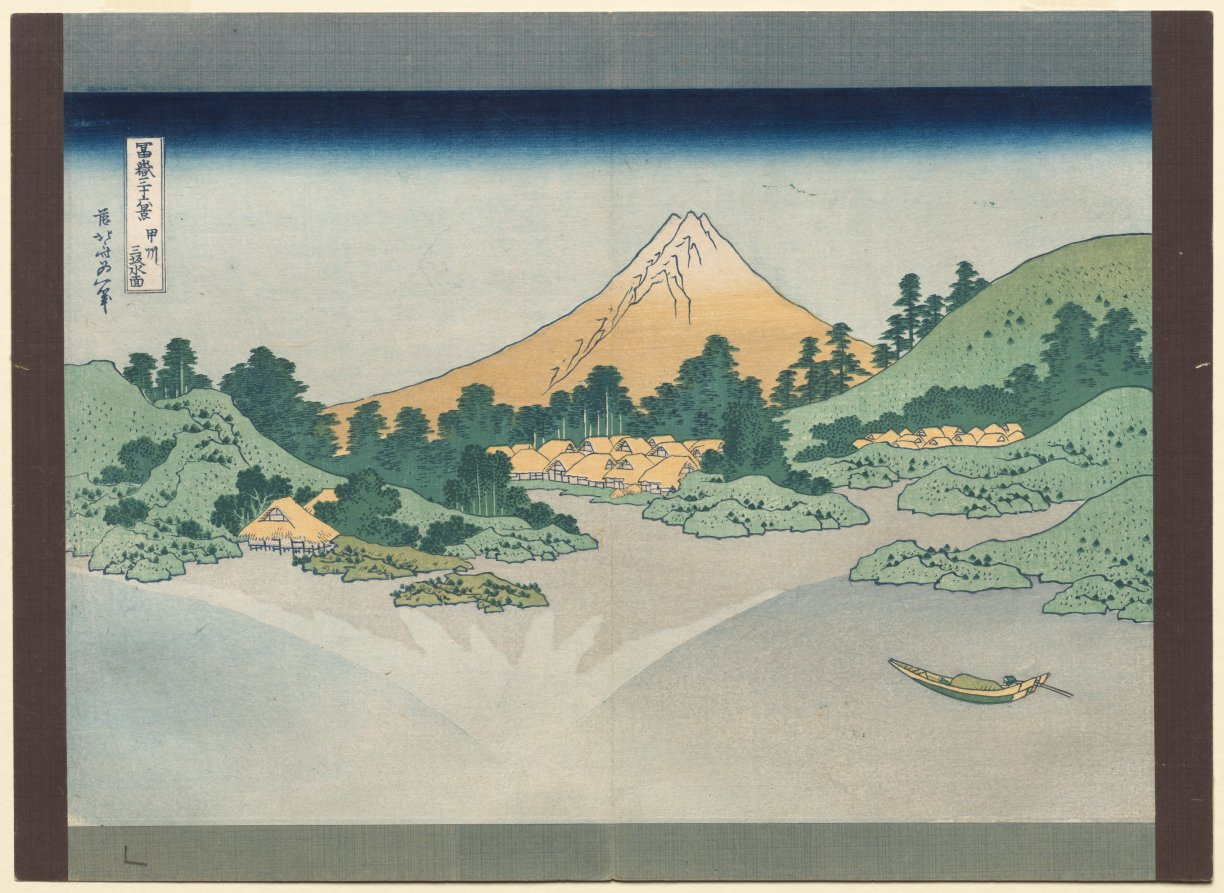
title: Thirty-Six Views of Mt. Fuji: The Surface of Lake Misaka in Kai Province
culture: Japan, Edo period (1615–1868)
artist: Katsushika Hokusai (Japanese, 1760–1849)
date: early 1830s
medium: color woodblock print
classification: Print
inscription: Signature: Zen Hokusai Iitsu hitsu Publisher: Nishimuraya Yohachi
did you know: Mount Fuji is reflected in the clear water of the lake.